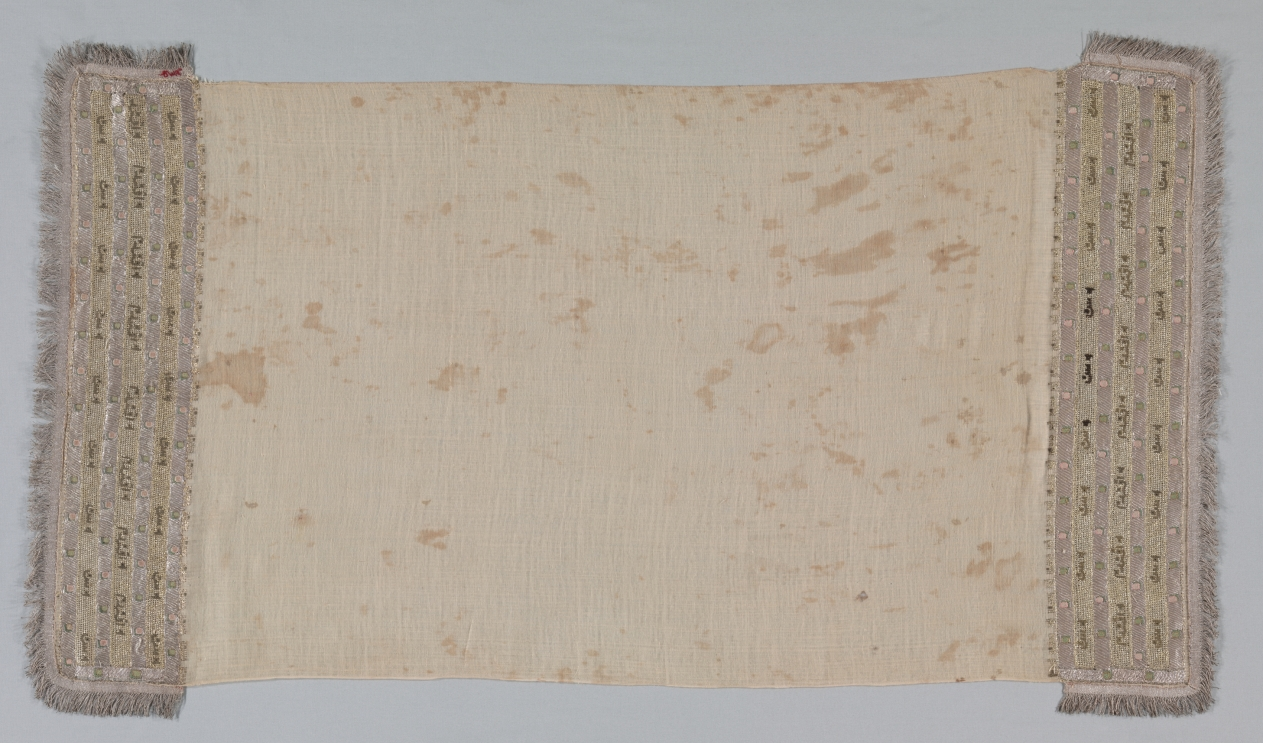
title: Embroidered Towel (Peshkir)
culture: Turkey, 19th century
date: 19th century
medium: embroidery: silk and gold and silver filé on cotton tabby ground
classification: Embroidery